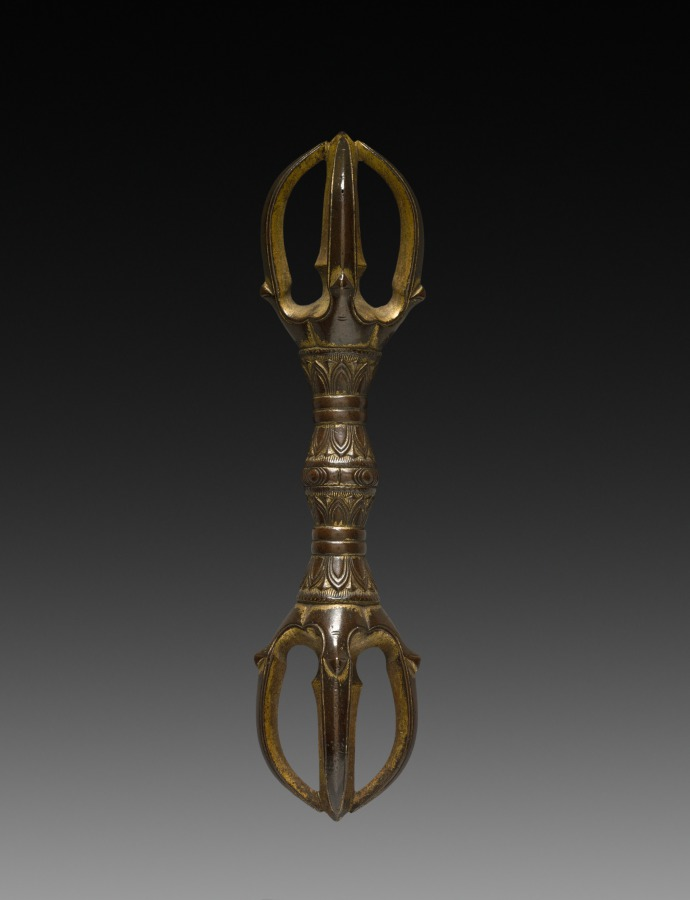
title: Goko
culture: Japan, Edo period (1615–1868)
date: 1700s-1800s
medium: gilt copper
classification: Metalwork